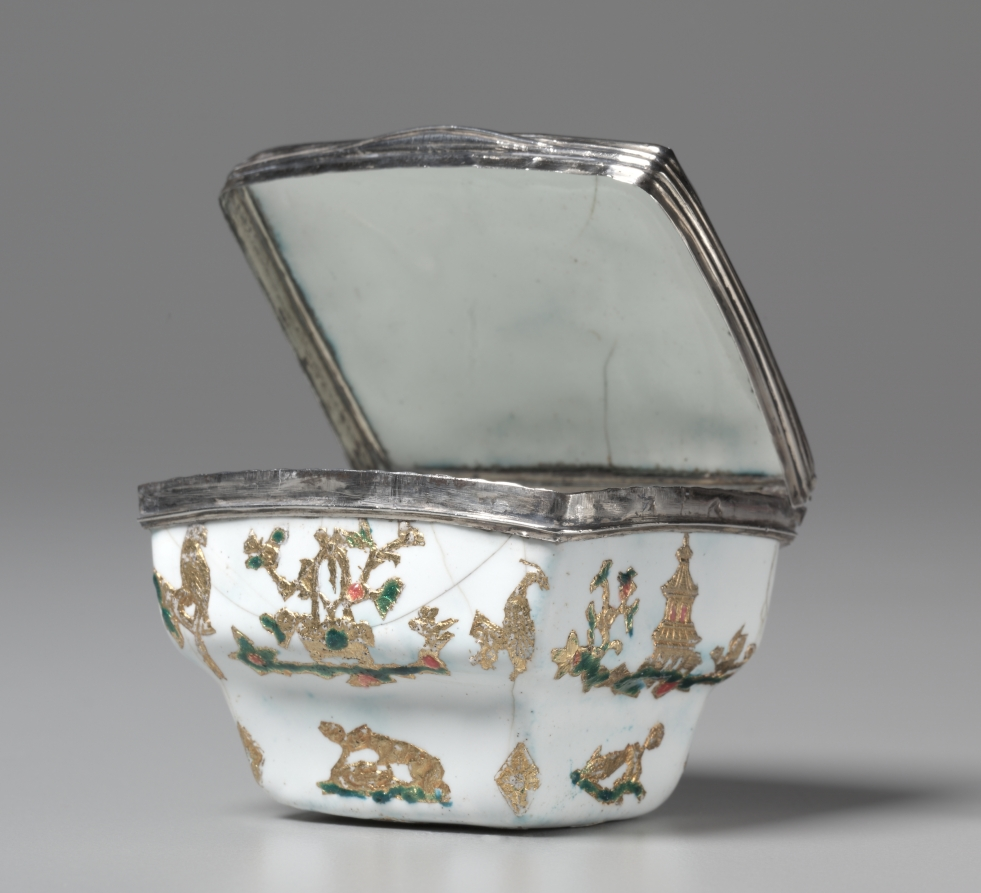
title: Box (Boîte)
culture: possibly France, mid-18th century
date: 1730–40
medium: enamel and gold leaf on copper mounted in silver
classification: Miscellaneous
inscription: [Traces of marks on mounts, too rubbed to be legible. One has previously been identified as possibly a French discharge mark of middle-18th century (Beuque 669 or 687). Maybe the discharge mark for small work of Hubert Louvet, Paris, 1732-38, left side of rim.]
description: Chinoiserie in 18th-century France incorporated imitations of East Asian motifs, designs, and ornaments into European art. These imitations were often distorted by the European imagination and were not accurate representations of the cultures from which they drew inspiration. Motifs typical of chinoiserie can be seen in this box’s floral patterns and repeated representations of pagodas, dragons, and peacocks.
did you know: The depictions of various animals and plants on this box have been covered in a very thin layer of gold called gold leaf.